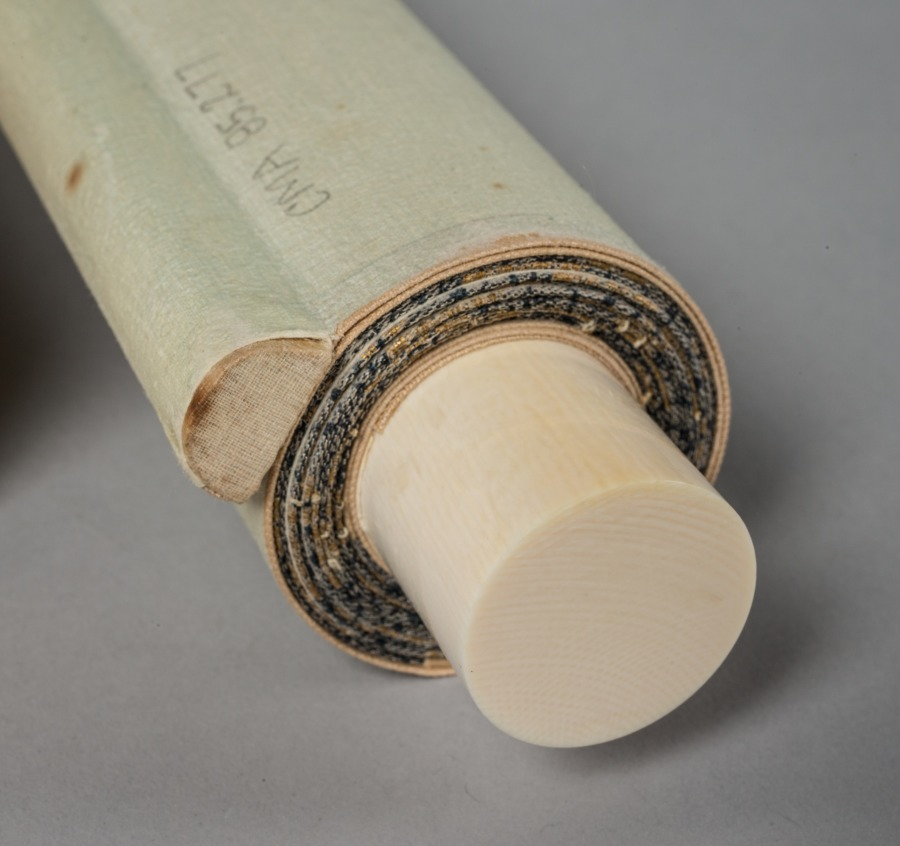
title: Stand-in Fugen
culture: Japan, Edo period (1615–1868)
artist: Kitao Masayoshi (Japanese, 1761–1824)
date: late 1700s–early 1800s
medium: hanging scroll; ink and color on silk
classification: Painting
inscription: artist's signature and two seals, lower right.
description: Here, a woman dressed as a man replaces Fugen, a bodhisattva—a being among those considered enlightened in Buddhism—who symbolizes learning as a path to awakening and typically rides an elephant. The painting teaches the lesson of impermanence through the petals falling from the lotus flower the woman holds. It also alludes to the legend of Eguchi, a 12th-century courtesan who, following an encounter with a Buddhist monk-poet called Saigyō, revealed herself to be a manifestation of Fugen.